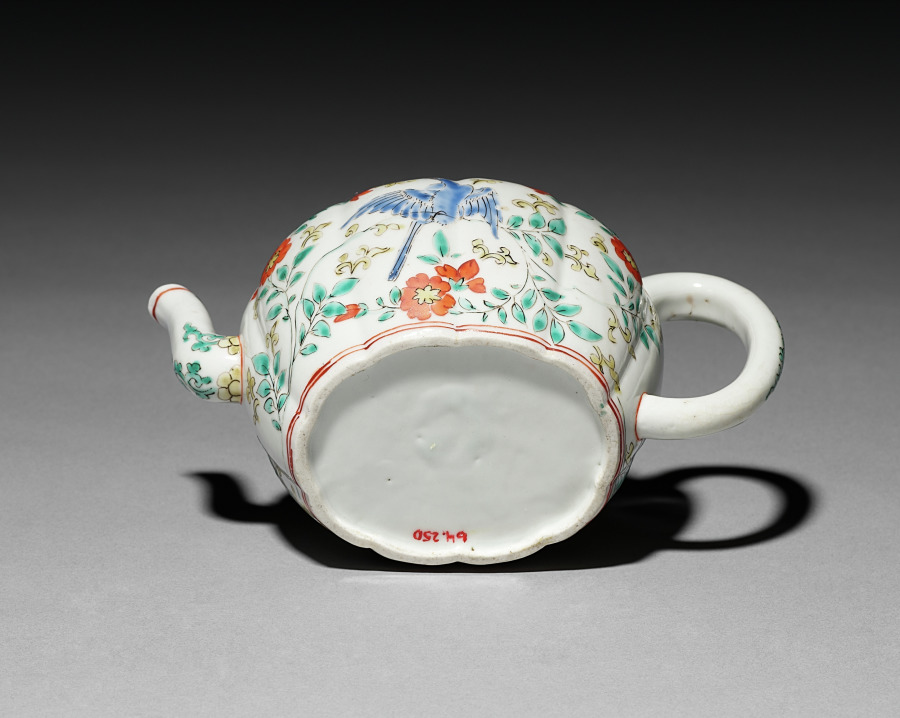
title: Teapot with Birds and Flowers (base)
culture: Japan, Edo period (1615–1868)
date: 1700s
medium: Porcelain with overglaze color enamel (Arita ware)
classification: Ceramic